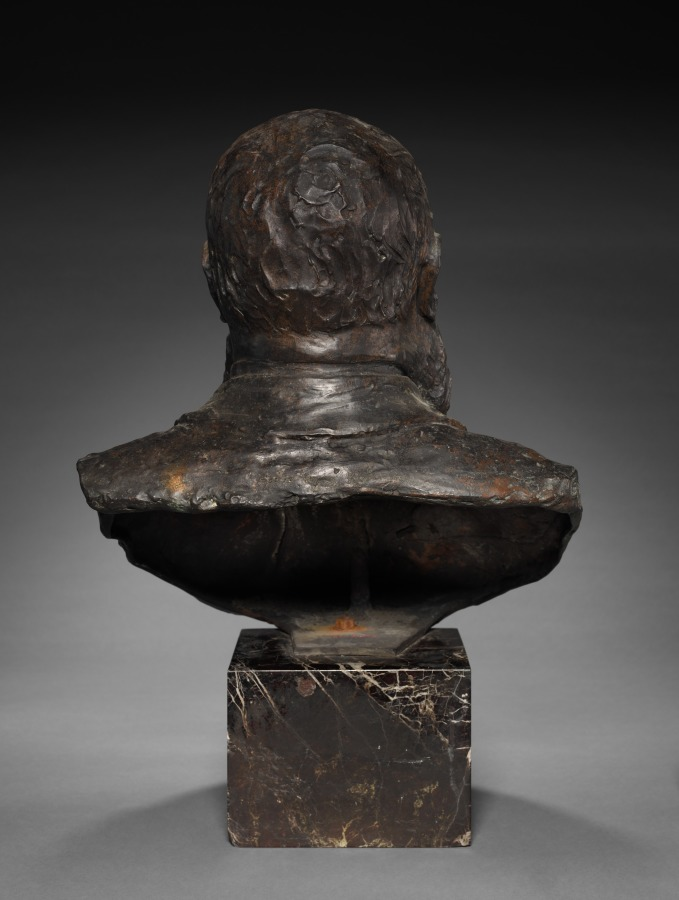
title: Claude Monet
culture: France, 20th century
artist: Paul Paulin (French, 1852–1937)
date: late 1800s-early 1900s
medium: bronze, marble base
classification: Sculpture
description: Paul Paulin was a renowned Parisian dentist who had a passion for sculpting and was encouraged by Edgar Degas to pursue an artistic career. Paulin is best known for his portrait busts of notable Impressionists. There are related versions of this portrait bust of the celebrated painter Claude Monet at three museums in Paris: the Petit Palais (plaster), the Musée d'Orsay (bronze), and the Musée Rodin (bronze).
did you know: In addition to Claude Monet, Paul Paulin also made portrait busts of Edgar Degas, August Renoir, Camille Pissarro, and Auguste Rodin.